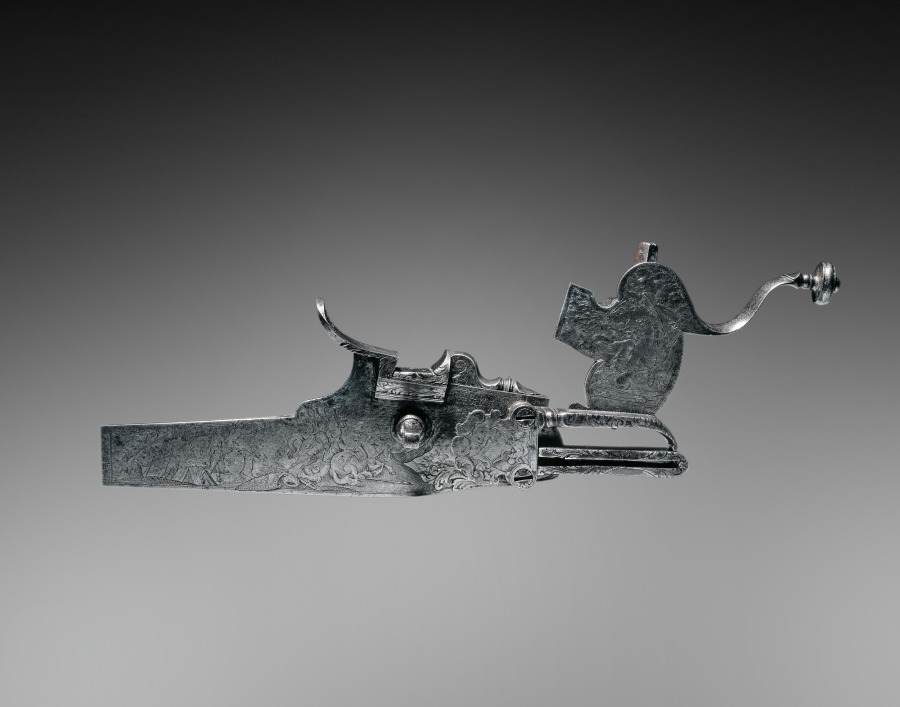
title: Wheel-Lock from a Hunting Rifle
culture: Germany, Munich, 18th century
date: c. 1720–40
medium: steel, engraved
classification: Arms and Armor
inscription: on lock: IOAN GEORG DAX IN MUNCHEN; engraver's signature: I.C. Stenglin Sr.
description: At the beginning of the 1500s a new type of ignition system was invented: the wheel-lock, the first self-igniting mechanism for guns. This type of ignition involved a piece of iron pyrites held in the jaws of a cock. When the trigger was pulled the pyrites pressed against the serrated edge of a prewound revolving wheel, creating a shower of sparks that ignited priming powder in a pan on top of the lock. This action sent a flash of flame through the vent hole to explode the main charge in the breech of the barrel. Originally part of a deluxe hunting rifle, the lock plate's entire surface is engraved in a chaotic scene. Combating cavaliers, Turks, acanthus leaves, and trophies cover every bit of space.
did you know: The engraver's signature, I.C. Stenglin Sr., can be seen on the edge running vertically.